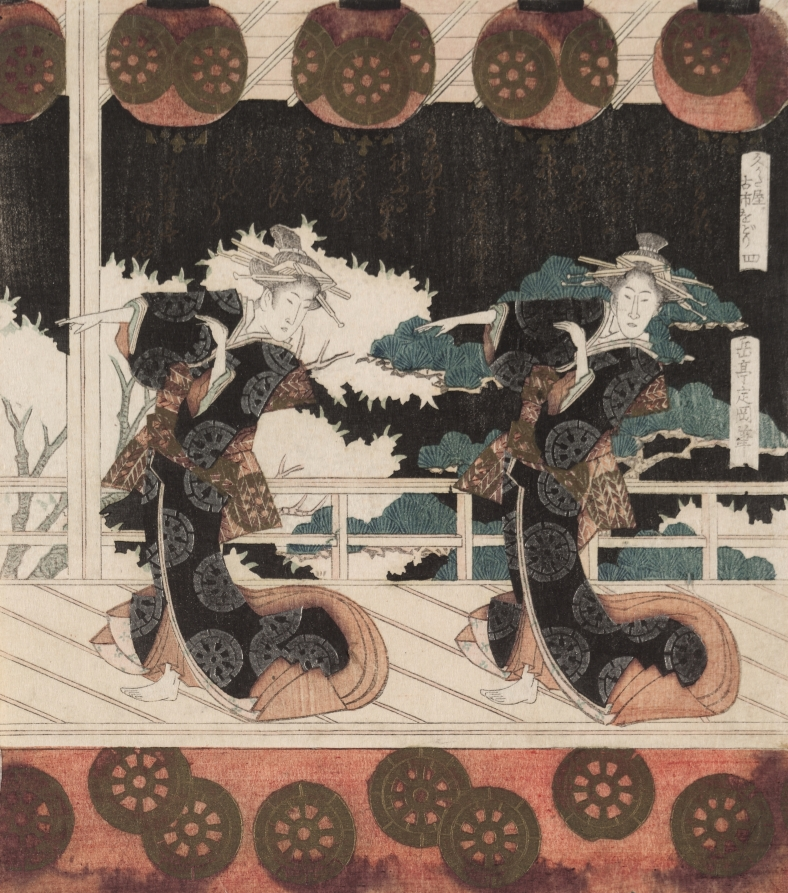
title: Furuichi Dance at the Hisagataya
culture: Japan, Edo period (1615–1868)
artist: Gakutei Harunobu (Japanese, 1786(?)–1868)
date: mid 1820s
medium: fourth of a pentaptych of woodblock prints; ink and color on paper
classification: Print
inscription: Signature: Gakutei Sadaoka hitsu